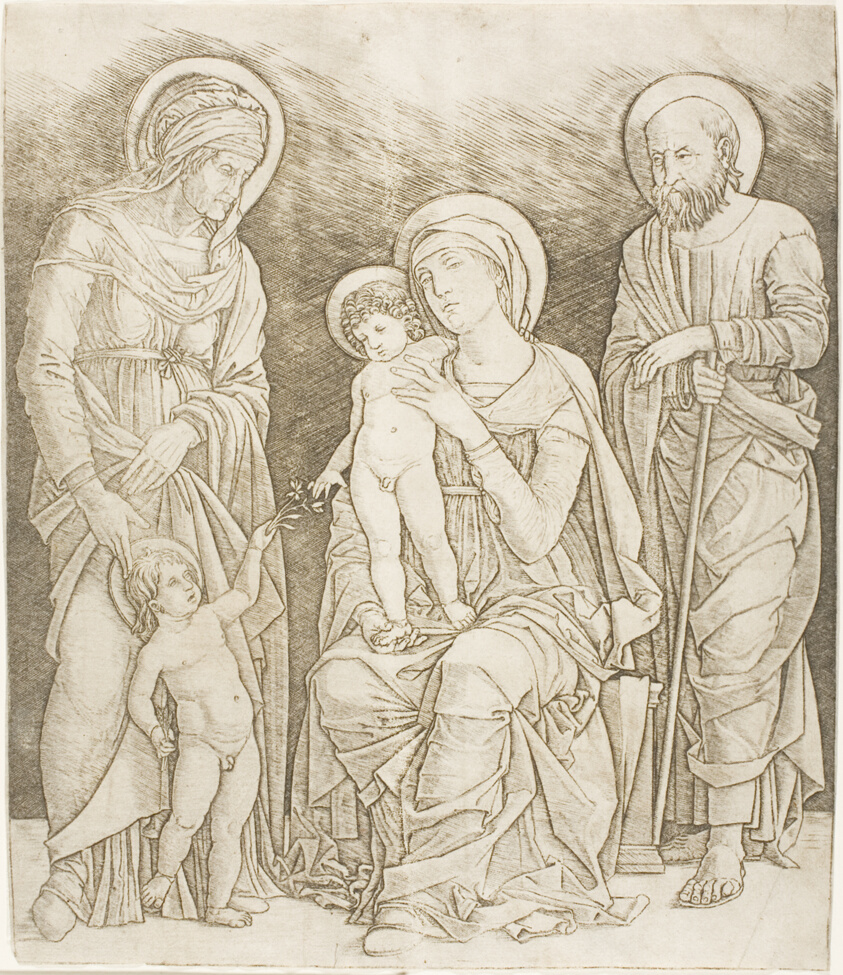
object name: Print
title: The Holy Family with the Infant Saint John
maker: Giovanni Antonio da Brescia (Italian, active c. 1490-after 1525); after Andrea Mantegna (Italian, 1431-1506)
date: 1500/10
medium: Engraving in black on buff laid paper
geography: Italy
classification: engraving; print; prints and drawing